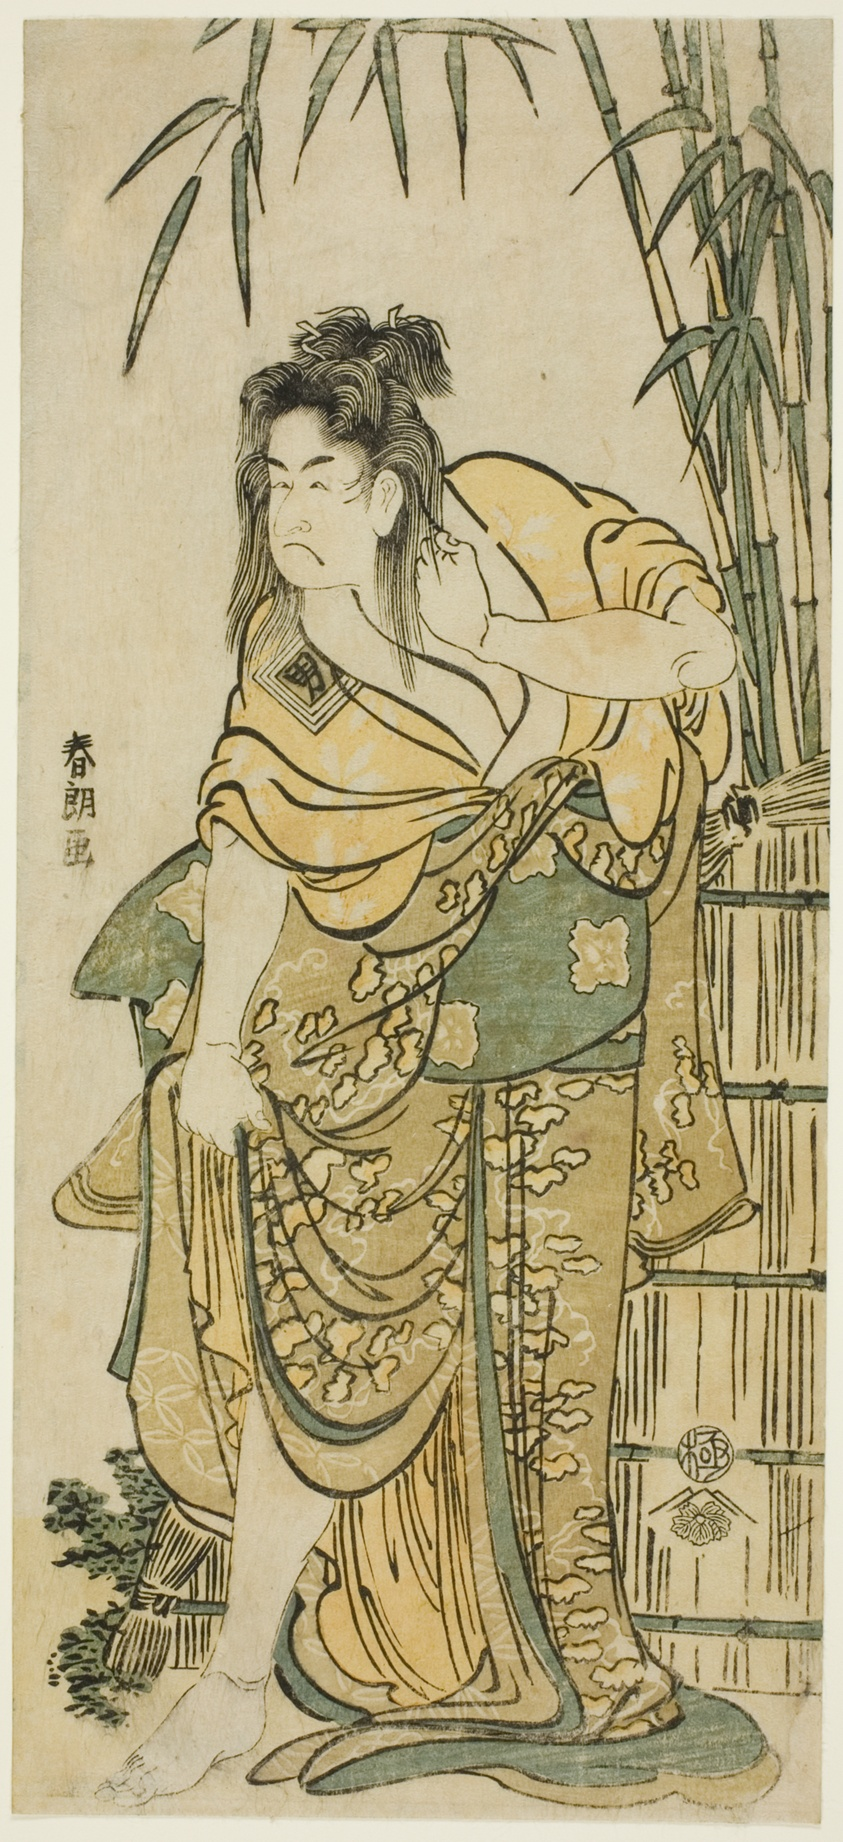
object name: Print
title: The Actor Ichikawa Komazo as a Woman with Dishevelled Hair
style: Japanese (culture or style)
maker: Katsushika Hokusai 葛飾 北斎; Japanese, 1760-1849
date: c. 1791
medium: Color woodblock print; hosoban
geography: Japan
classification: woodblock print; print; asian art